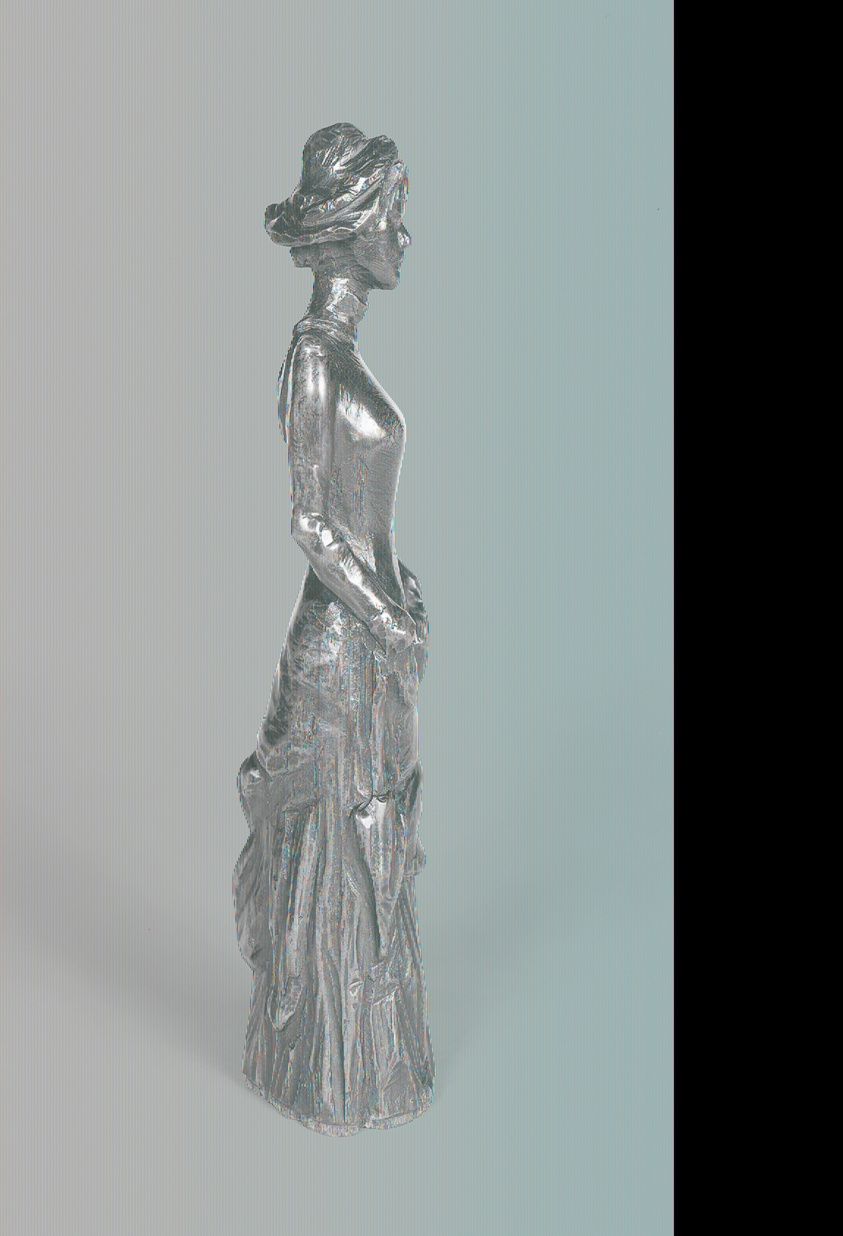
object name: Sculpture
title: Woman Strolling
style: 19th century, Post-Impressionism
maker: Paul Gauguin (French, 1848–1903)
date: c. 1880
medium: Tropical laurel (Terminalia), stained red and black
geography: France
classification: sculpture; european decorative arts; france; french; wood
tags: woman, figure, black (color), red (color), wood, sculpture, fashion, walking